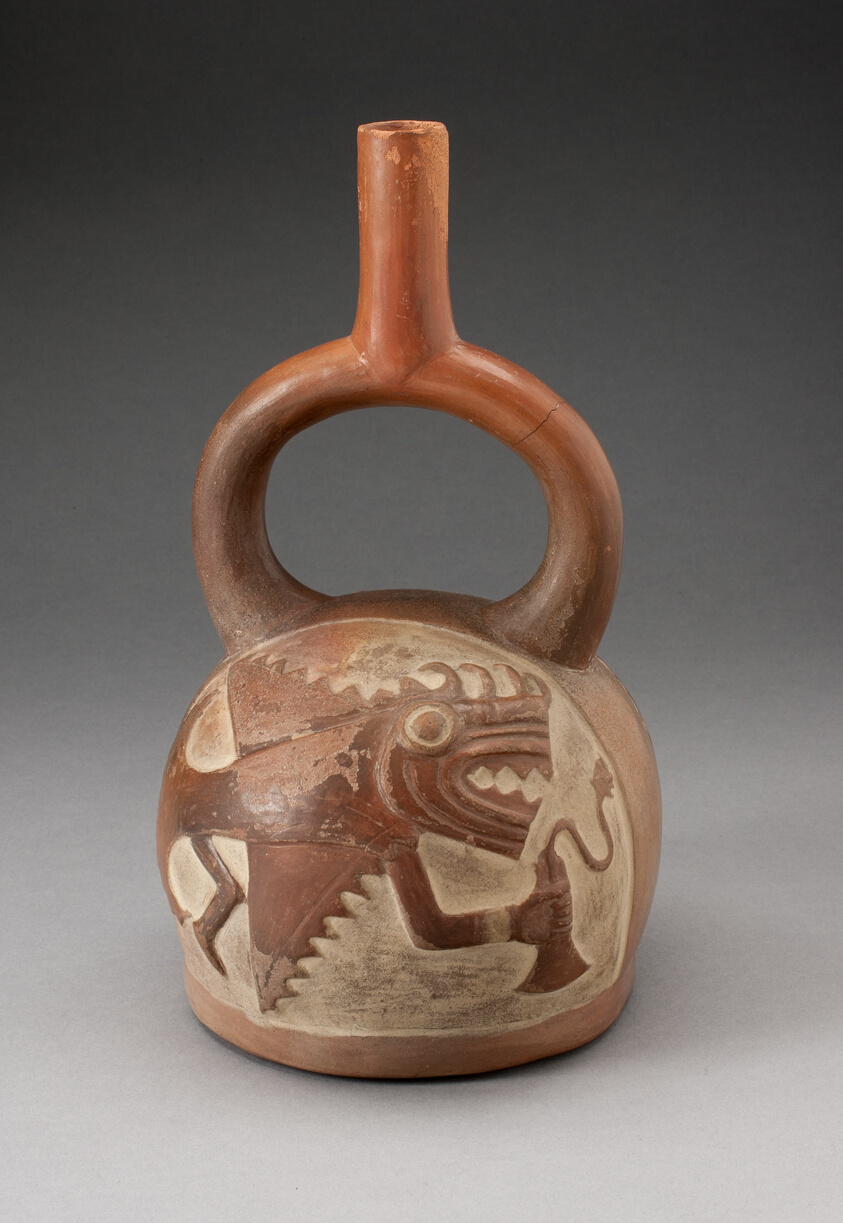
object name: Vessel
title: Stirrup Spout Vessel Incised with Anthropomorphic Fish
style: moche, mochica iv, mochica, early intermediate period, Pre-Columbian, americas, Arts of the Americas, andean, andes, south american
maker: Moche (North coast, Peru)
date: 100 BCE–500 CE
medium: Ceramic and pigment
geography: Peru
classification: earthenware; ceramics; vessel; art of the americas